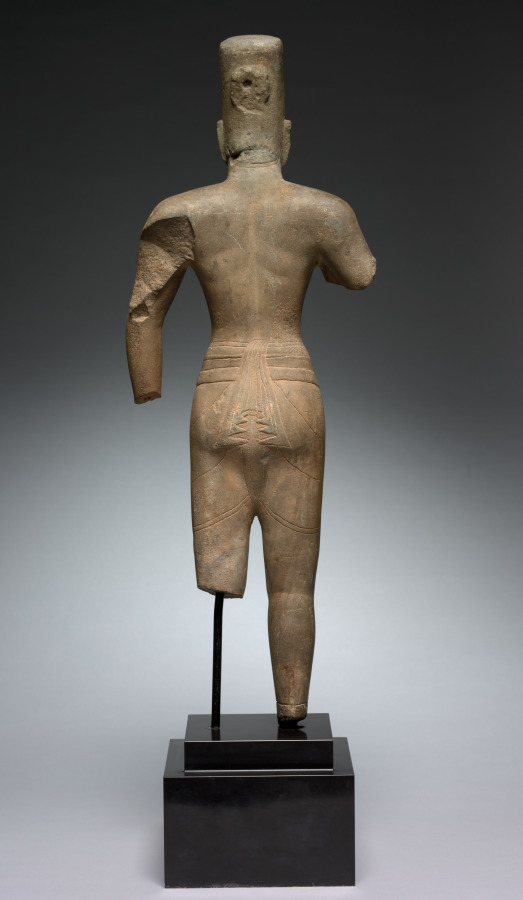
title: Vishnu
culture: Cambodia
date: 650–99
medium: gray sandstone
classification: Sculpture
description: The muscular physique, sensitive smile, and flat-topped high crown are characteristics of Vishnu images made during the pre-Angkorian period (c. 550–802) in Cambodia. This sculpture probably was the sole object of worship in a small brick temple sanctum.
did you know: The god wears a short garment (sampot) tied to form a loop on the left with the hanging ends on the right thigh.